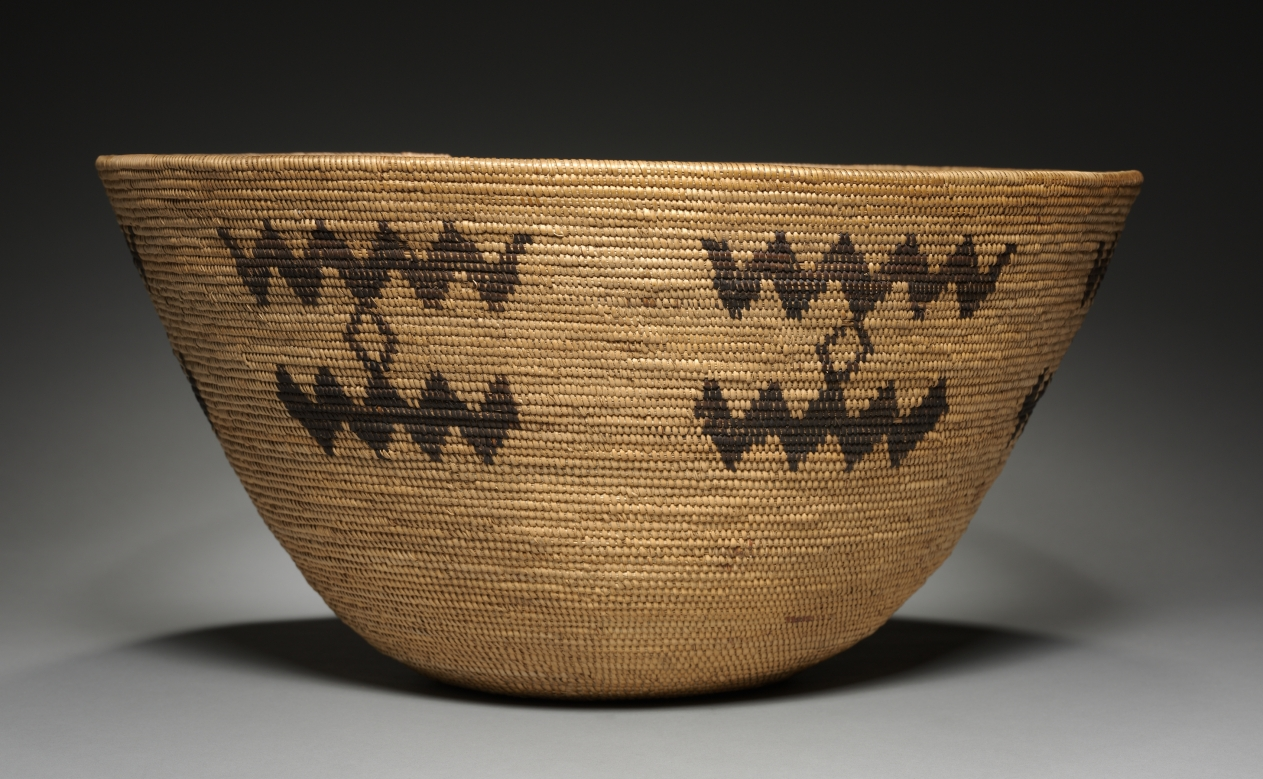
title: Food or Carrying Bowl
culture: California, Pala Band Luiseño, Pala Mission, late 19th - early 20th century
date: late 1800–early 1900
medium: coiled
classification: Basketry